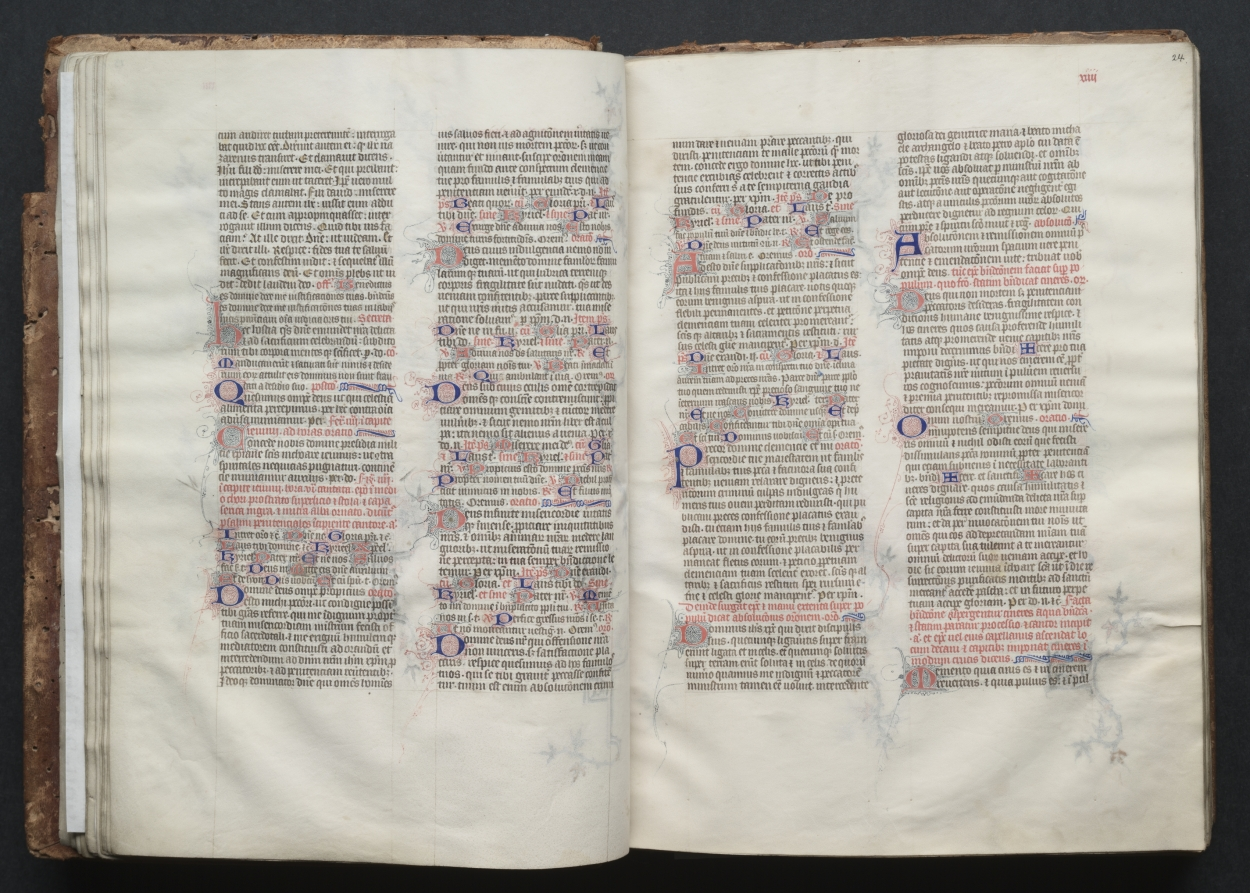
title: The Gotha Missal: Fol. 23v, Text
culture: France, Paris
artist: Master of the Boqueteaux (French)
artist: and Workshop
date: c. 1375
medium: ink, tempera, and gold on vellum; blind-tooled leather binding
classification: Bound Volume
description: The style and quality of this manuscript's decoration is typical of deluxe Parisian books made for aristocratic or royal patrons. Most of the book's decoration appears to be the work of the Master of the Boqueteaux, an artist active at the court of King Charles V (died 1380). His style was apparently shared by a number of book illuminators working in and around Paris. It is very possible that the Gotha Missal belonged to Charles V, but is not provable because the manuscript has no royal portraits and lacks a colophon. Given the book's magnificent decoration, however, it would seem that it was produced for a Valois prince, if not for the king himself. The manuscript receives its name from the German dukes of Gotha, its later owners.